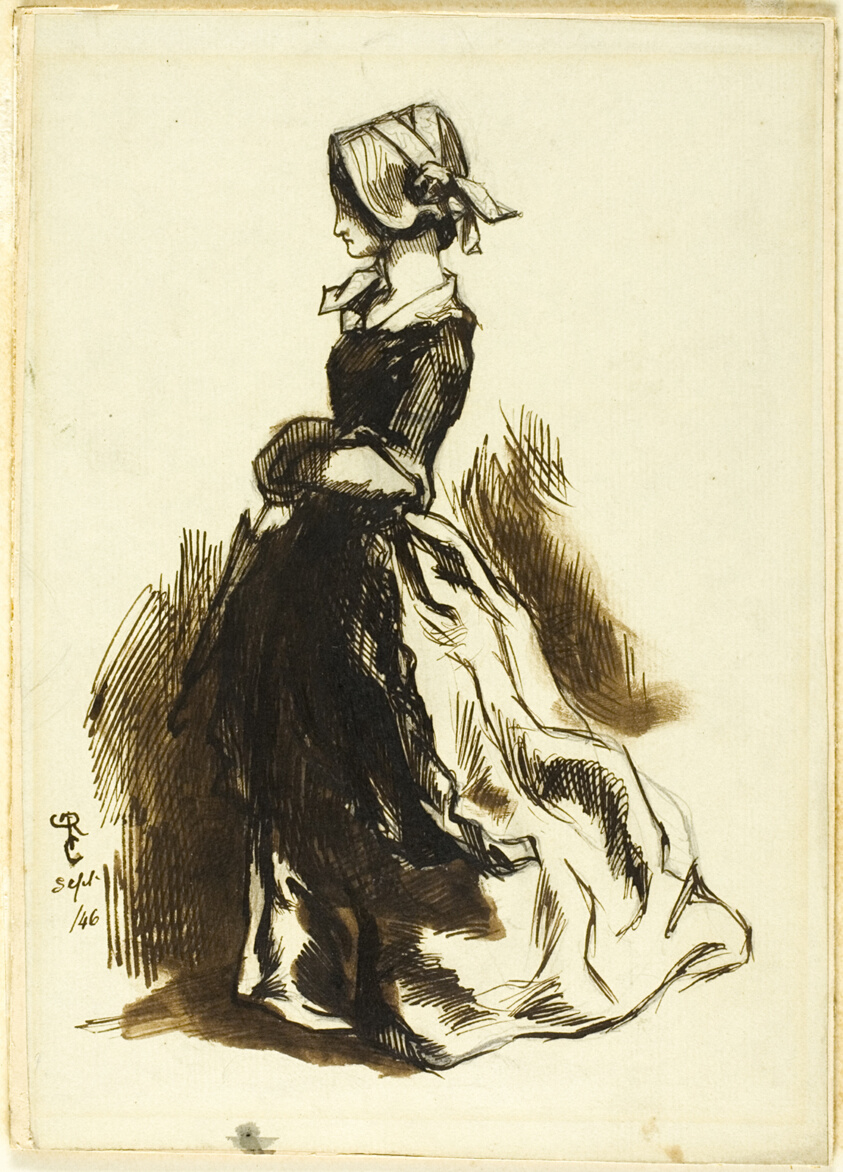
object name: Drawing and Watercolor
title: Full-length Portrait of a Woman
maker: Dante Gabriel Rossetti (English, 1828-1882)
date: 1846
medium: Pen and brown ink with brush and brown wash, over graphite, on ivory laid paper, laid down on board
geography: England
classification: pen and ink drawings; drawings (visual works); prints and drawing